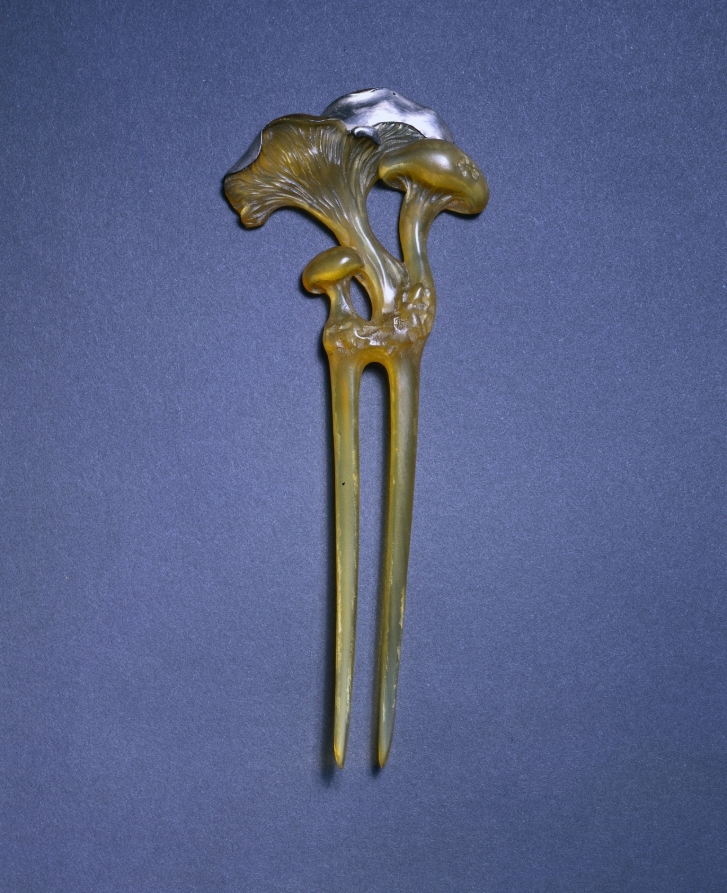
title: Hair Ornament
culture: France, early 20th Century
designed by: Jeannine Chenneviere (French)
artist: possibly by Lucien Gaillard (French, 1861–1942)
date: c. 1903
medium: horn with silver mounts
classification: Jewelry